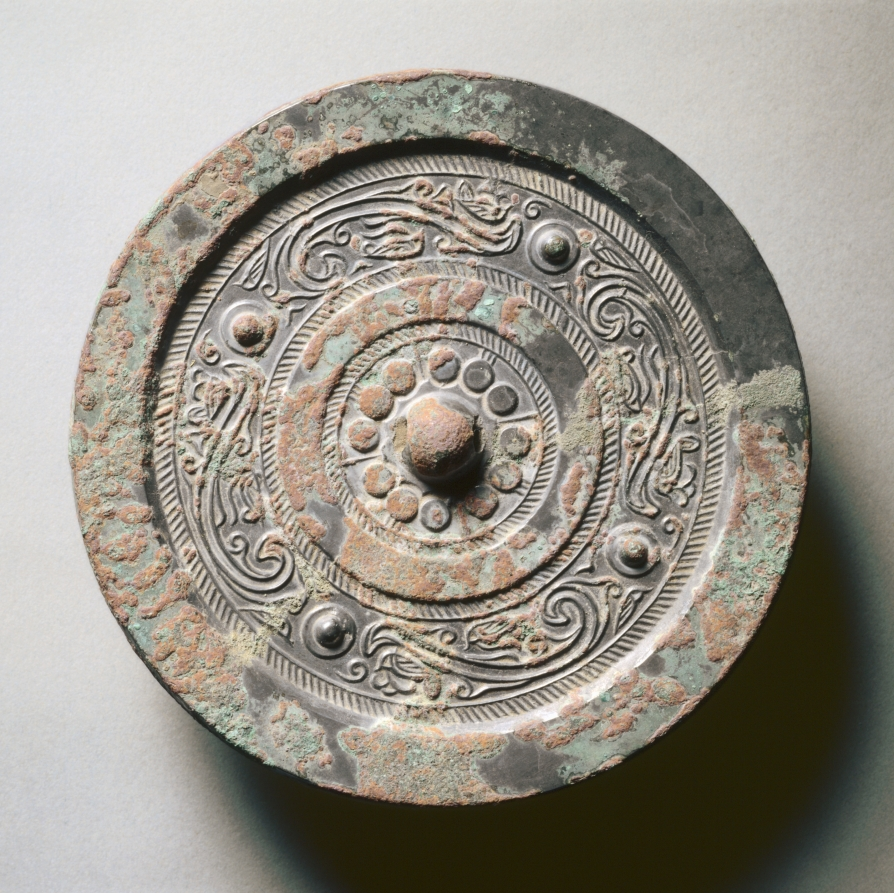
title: Mirror with Four Nipples, Quasi-Dragons, and Birds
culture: China, Western Han dynasty (206 BCE–8 CE)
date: late 300s BCE–50 CE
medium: bronze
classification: Metalwork